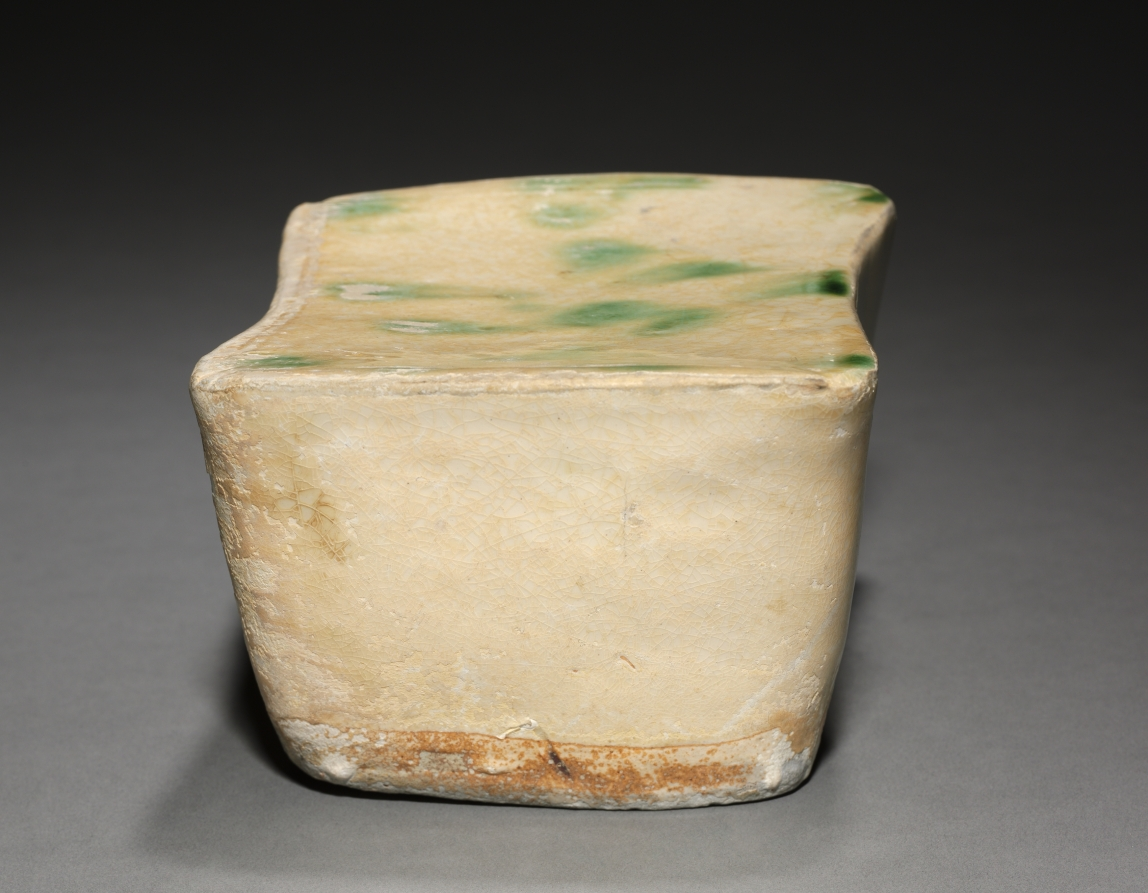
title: Pillow: Wazhaping ware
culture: China, Hunan province, Changsha, Five dynasties (907-960)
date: 906–960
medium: glazed stoneware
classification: Ceramic